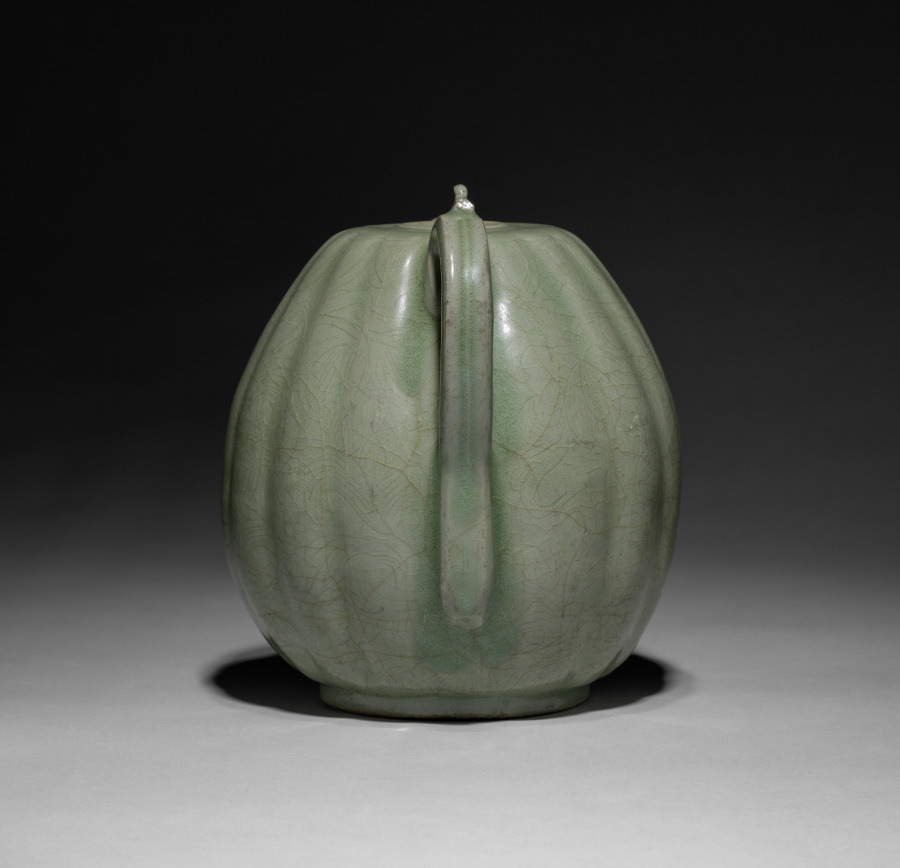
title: Wine Pot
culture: Korea, Goryeo dynasty (918–1392)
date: 918–1392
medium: pottery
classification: Ceramic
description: As early as the seventh century, the practice of drinking tea and wine became an important part of elite culture in Korea. Elites of the Goryeo period commissioned a variety of types of utensils and vessels including this elegant pot, not only to make their drinking experience more exciting, but also to show their appreciation of nature.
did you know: Originally the lid was not coupled with this pot.